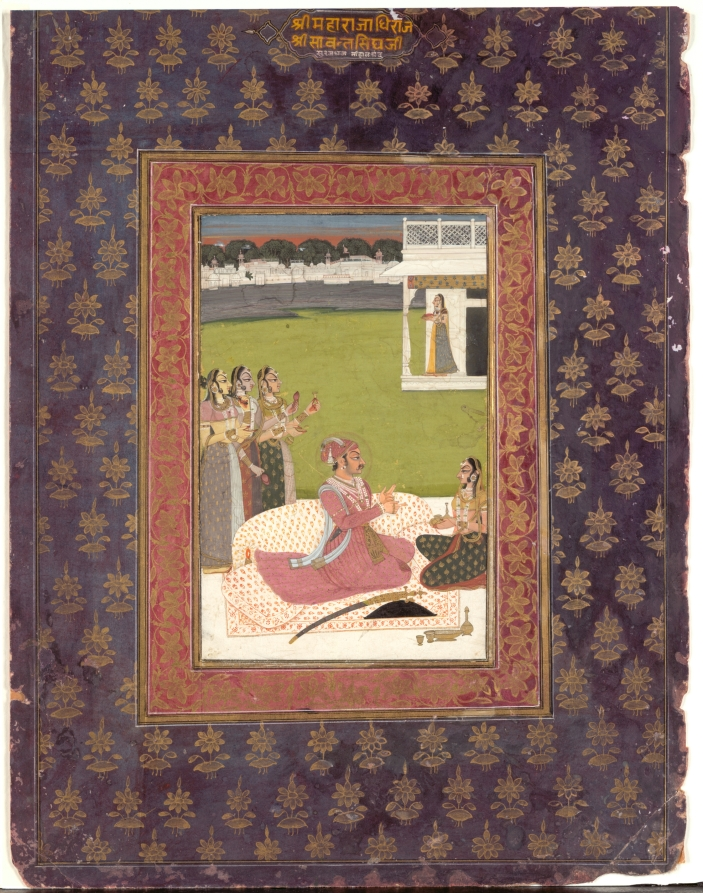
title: Portrait of Maharaja Savant Singh with Consort, Bani Thani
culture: India, Rajasthan, Kishangarh school, possibly Savant Singh reign (1748-1757)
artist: attributed to Nihal Chand (Indian)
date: mid-1700s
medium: Gum tempera, ink, and gold on paper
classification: Painting